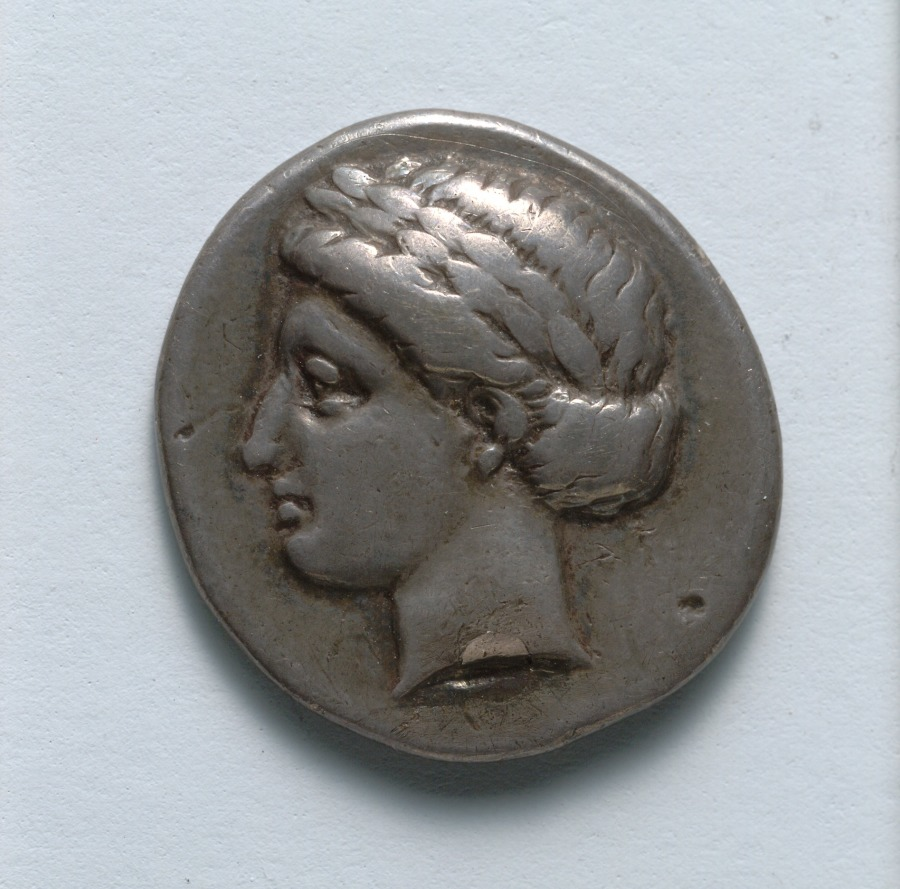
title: Drachm: Head of Apollo (obverse); Lyre (reverse)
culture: Greek, minted at Kolophon (Ionia)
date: c. 389–350 BCE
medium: silver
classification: Coins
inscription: ΙΗΝΗΣ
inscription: ΚΟΛΟΦΩ